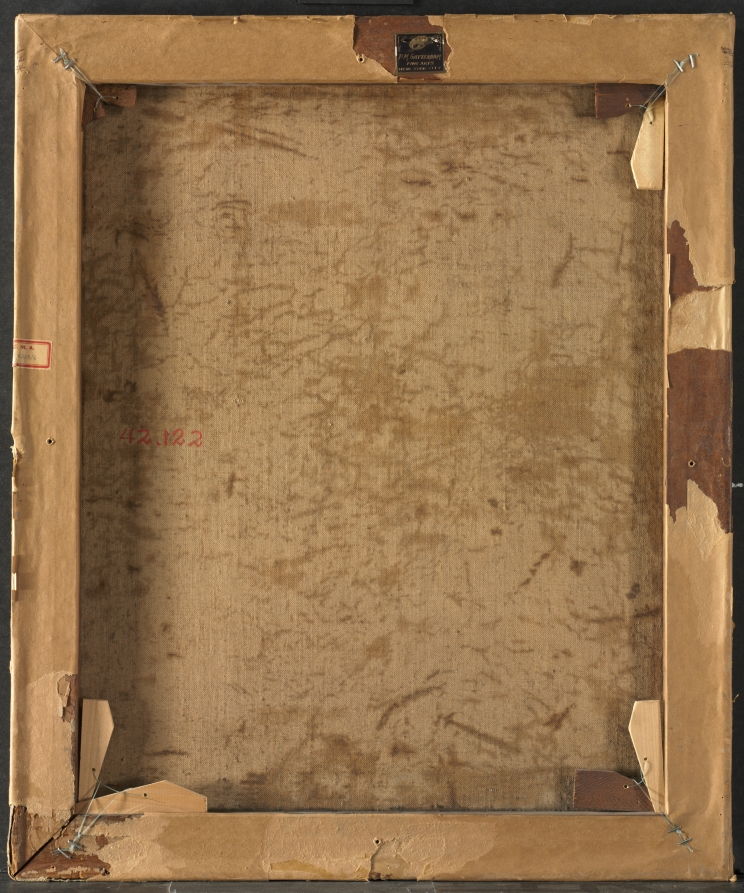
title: Deserted Wharf (The Old Mill at Cos Cob)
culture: America, late 19th Century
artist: John Henry Twachtman (American, 1853–1902)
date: before 1899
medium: oil on canvas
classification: Painting